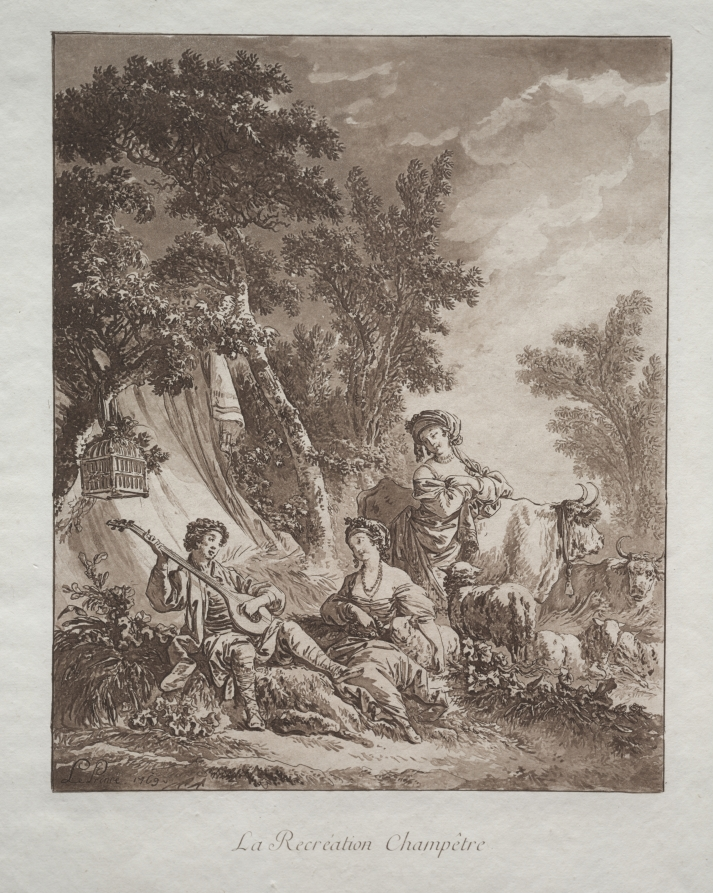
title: Rural Recreation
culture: France, 18th century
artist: Jean Baptiste Le Prince (French, 1734–1781)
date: 1769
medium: etching and aquatint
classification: Print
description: To create printed reproductions of his wash drawings, Le Prince refined the method of aquatint, which uses particles of resin and acid to etch areas of granular tone into the printing plate. The finished effect imitates the subtle gradations of light and shadow achieved in wash drawings like Landscape with Watermill.